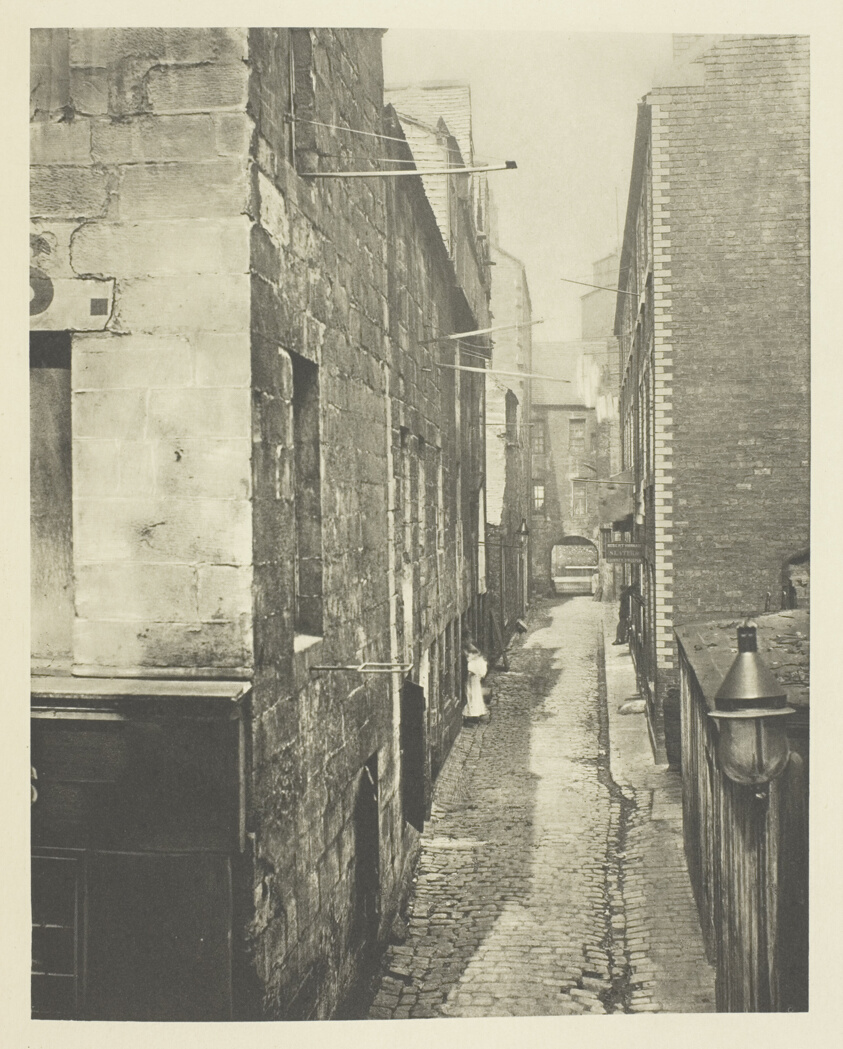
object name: Photograph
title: Laigh Kirk Close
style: 19th century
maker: Thomas Annan (Scottish, 1829–1887)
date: 1868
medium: Photogravure, plate 23 from the book "The Old Closes & Streets of Glasgow" (1900)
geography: Scotland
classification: photograph; photography